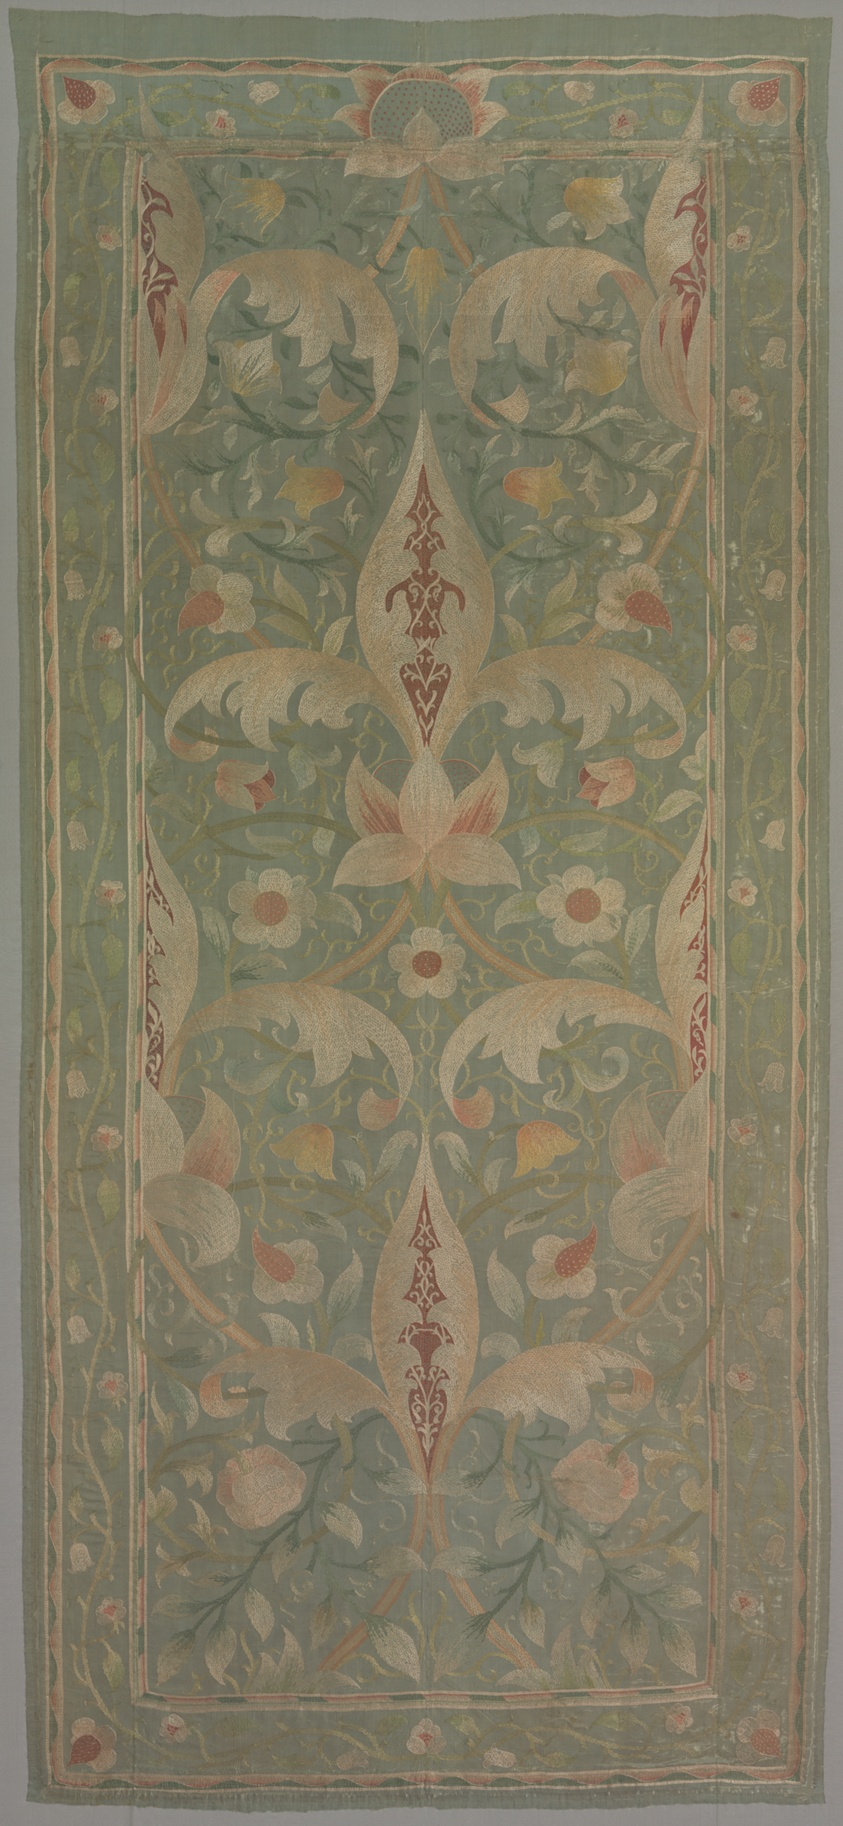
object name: Textile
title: Lotus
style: Arts and Crafts Movement, british, 19th century, British Arts and Crafts Movement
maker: Design attributed to May Morris (English, 1862–1938); Produced by Morris & Co., London (English, 1875–1940); Embroidered by the Decorative Arts Society, Chicago (American, founded 1877)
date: Design by 1888, made 1888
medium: Silk, warp-float faced twill weave; embroidered in satin and stem stitches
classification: textile; needlework (visual works)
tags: floral, lotus